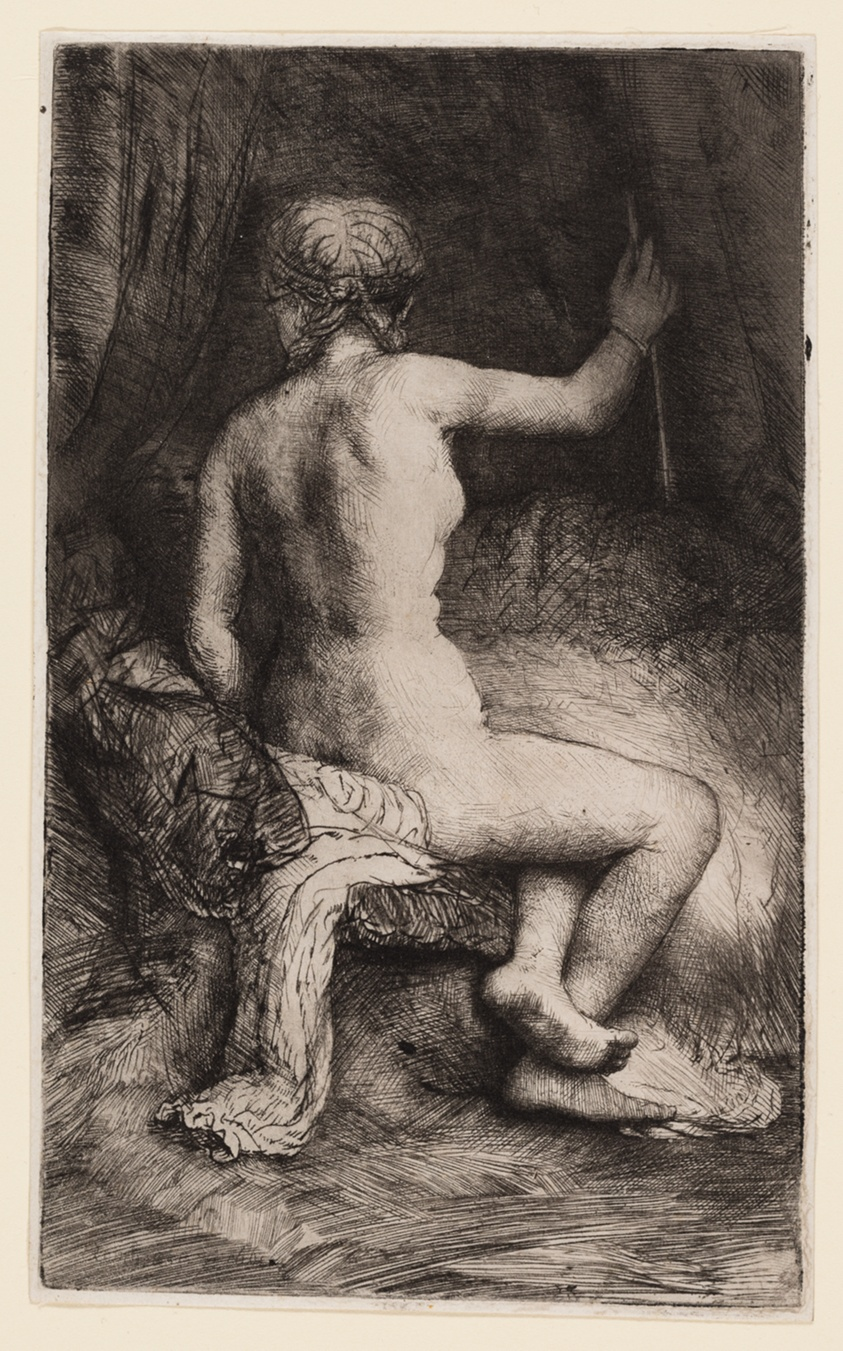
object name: Print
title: Woman with the Arrow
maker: Rembrandt van Rijn (Dutch, 1606-1669)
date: 1661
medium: Etching, drypoint and burin on ivory laid paper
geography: Holland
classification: etching; print; prints and drawing; paper; drypoint; burin